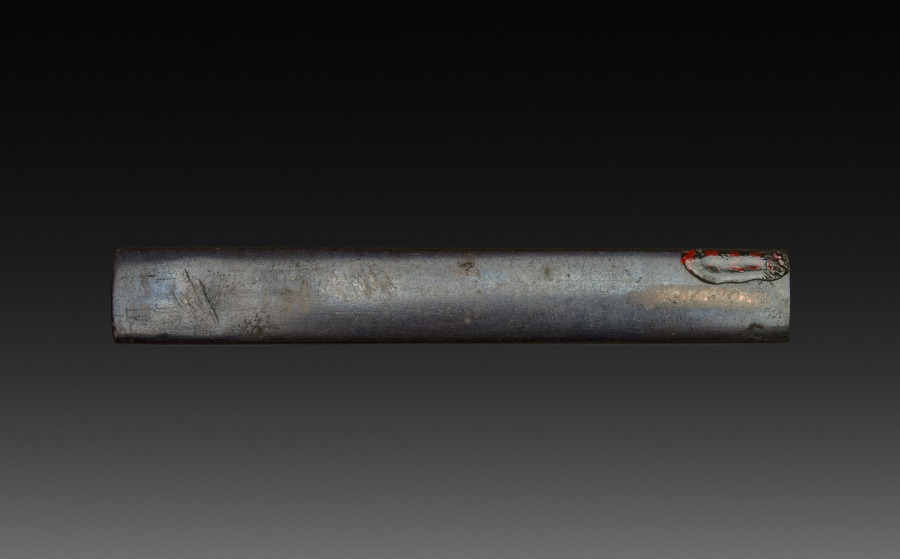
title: Knife Handle (Kozuka)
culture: Japan, Edo period (1615–1868)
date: c 1800s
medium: inlaid bronze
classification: Metalwork